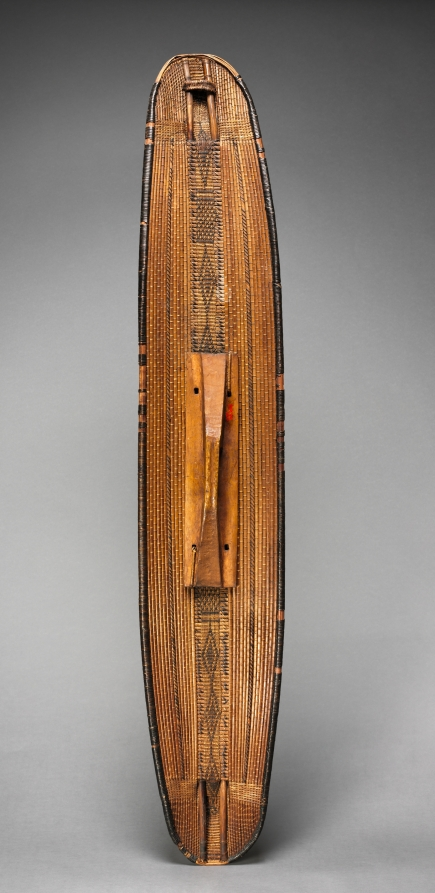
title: Shield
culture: Central Africa, Democratic Republic of the Congo, early 20th century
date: c. 1900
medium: Bamboo, wood, and plant fibers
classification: Arms and Armor